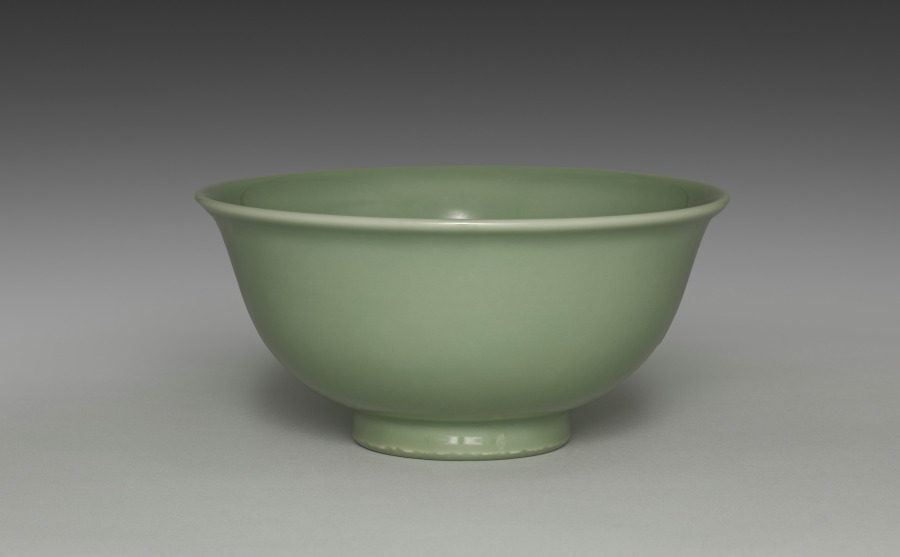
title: Dining Bowl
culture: Japan, Meiji period (1868–1912)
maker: Seifū Yohei III (Japanese, 1851–1914)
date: 1912–14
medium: Porcelain with green glaze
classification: Ceramic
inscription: 共箱の箱書：（蓋表）秘色彩古磁盂（印：清風）；（蓋裏）清風制之（印：帝室技藝員）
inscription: 彫銘：清風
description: This Yohei III dining bowl with an everted rim has a glaze identified in its box lid inscription as hisoku (C. mise), or “mysterious color.” This name typically refers specifically to a type of high-quality, green-glazed ceramic produced in the ninth and tenth centuries at the Yue kilns in China’s Zhejiang Province as tribute ware for the imperial family.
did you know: Many ceramics created by the Seifū Studio refer to and emulate Chinese ceramics in form and glazing.